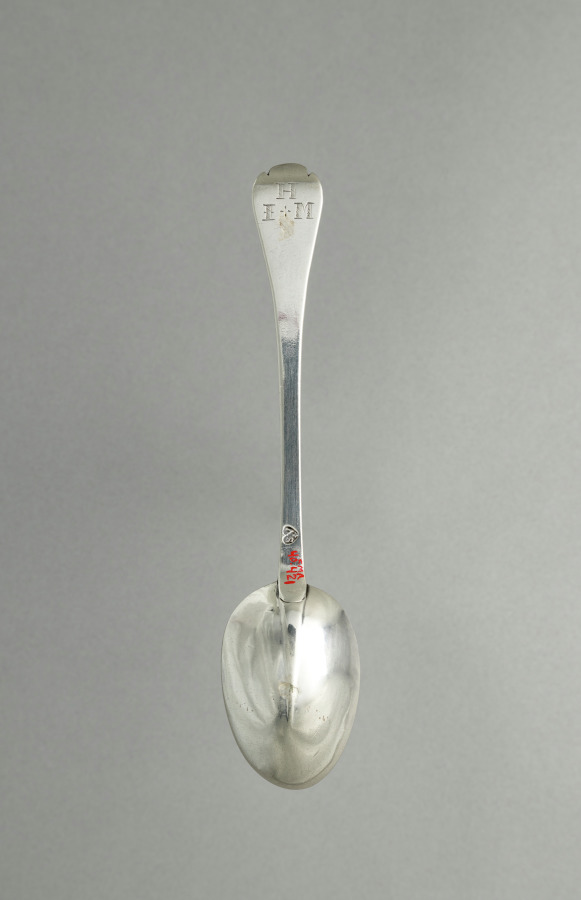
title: Tablespoon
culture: America, Rhode Island, Newport, 18th century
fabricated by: Samuel Vernon (American, 1683–1737)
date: c. 1705–1715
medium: silver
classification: Silver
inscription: engraved "H" over "I+M" in cross-hatched block letters on back of handle end.